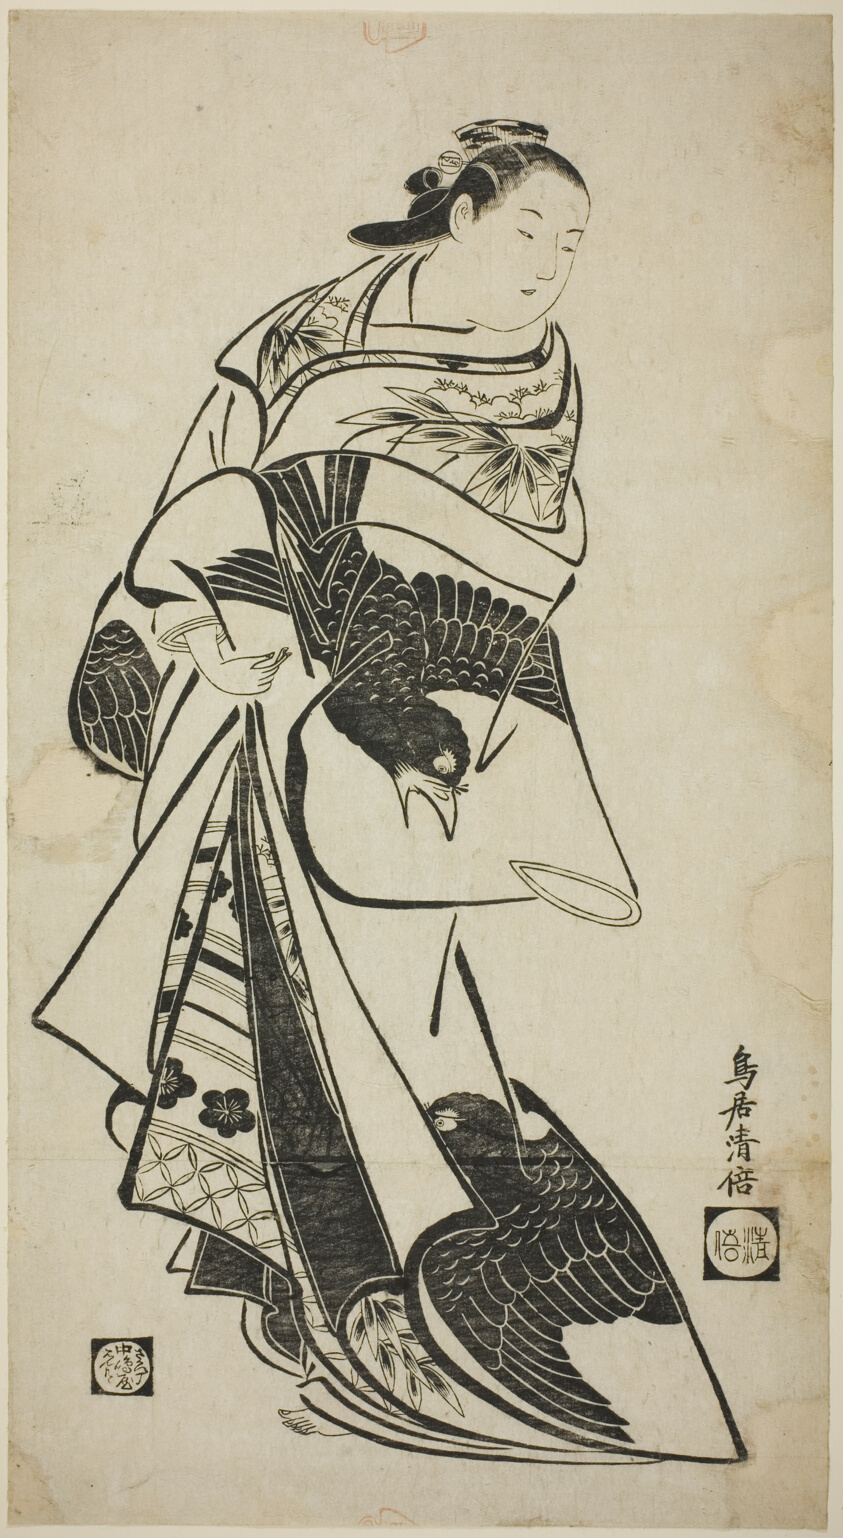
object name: Print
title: Standing Figure of a Woman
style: Japanese (culture or style)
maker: Torii Kiyomasu I (Japanese, active c. 1704–18 (?))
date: c. 1715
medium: Woodblock print; o-oban, sumizuri-e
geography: Japan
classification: woodblock print; print; asian art; woodblock